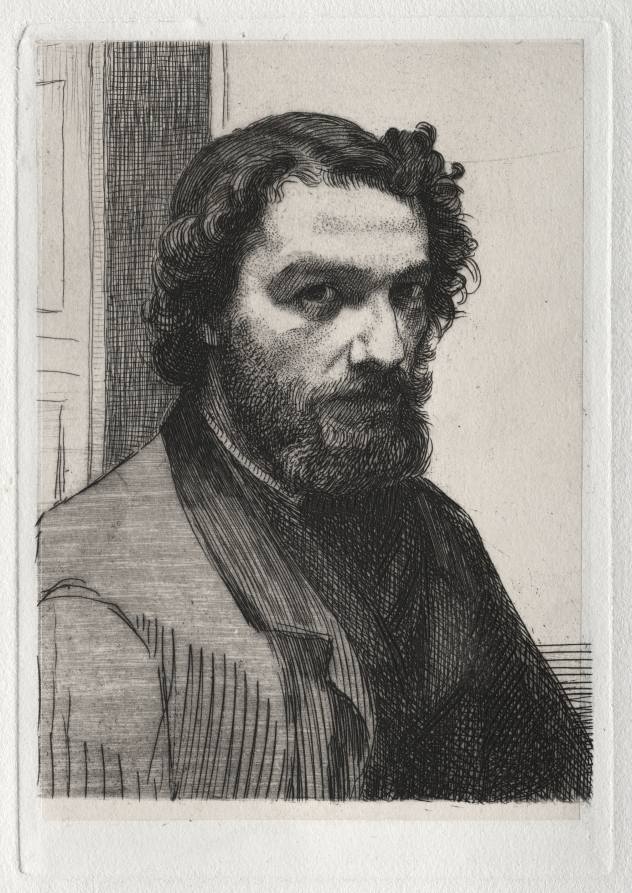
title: Alphonse Legros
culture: France, 19th century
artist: Félix Bracquemond (French, 1833–1914)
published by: Cadart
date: 1861 (printed 1875)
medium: etching on chine collé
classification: Print